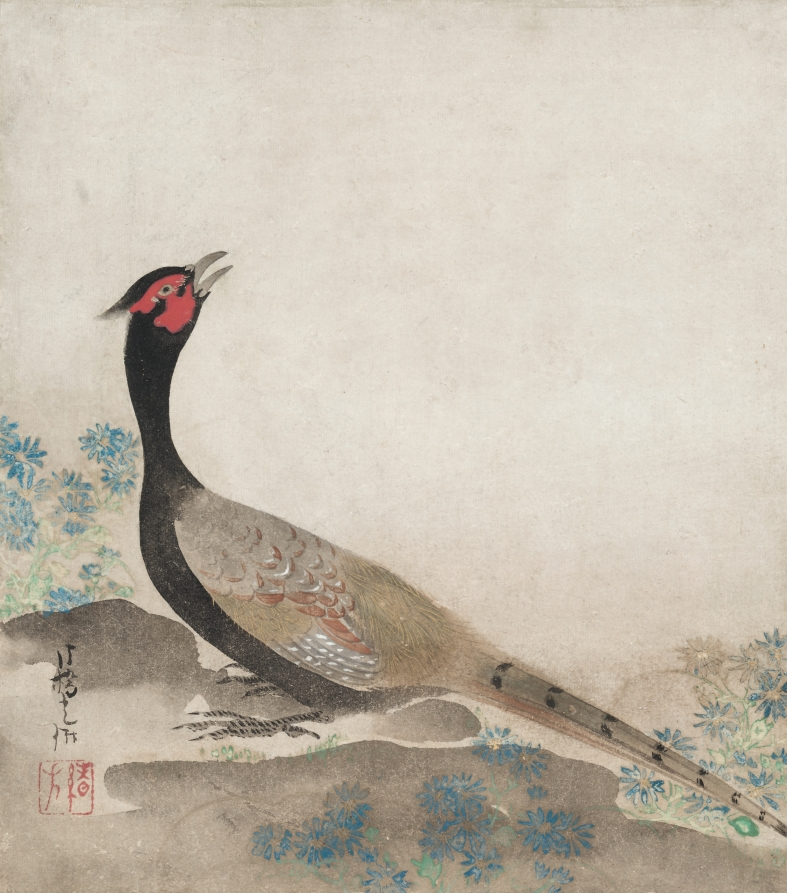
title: Pheasant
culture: Japan, Edo period (1615–1868)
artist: Ogata Kōrin (Japanese, 1658–1716)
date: 1658–1716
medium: hanging scroll; ink and color on silk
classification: Painting